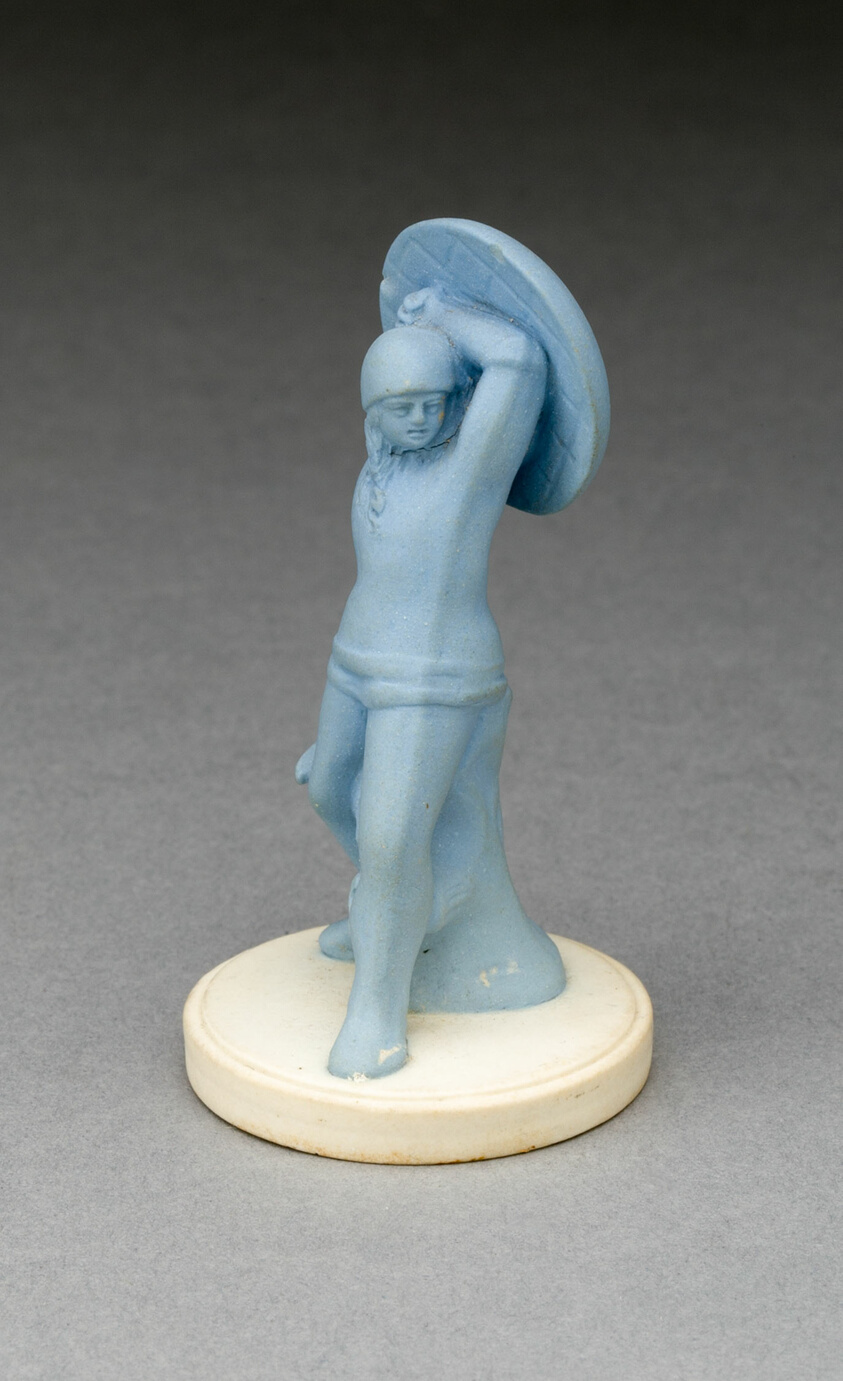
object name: Ceramics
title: Chess Piece: Pawn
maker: Wedgwood Manufactory (England, founded 1759)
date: 19th century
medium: Stoneware (jasperware)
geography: Burslem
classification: accessories (object genre); stoneware; european decorative arts; ceramics